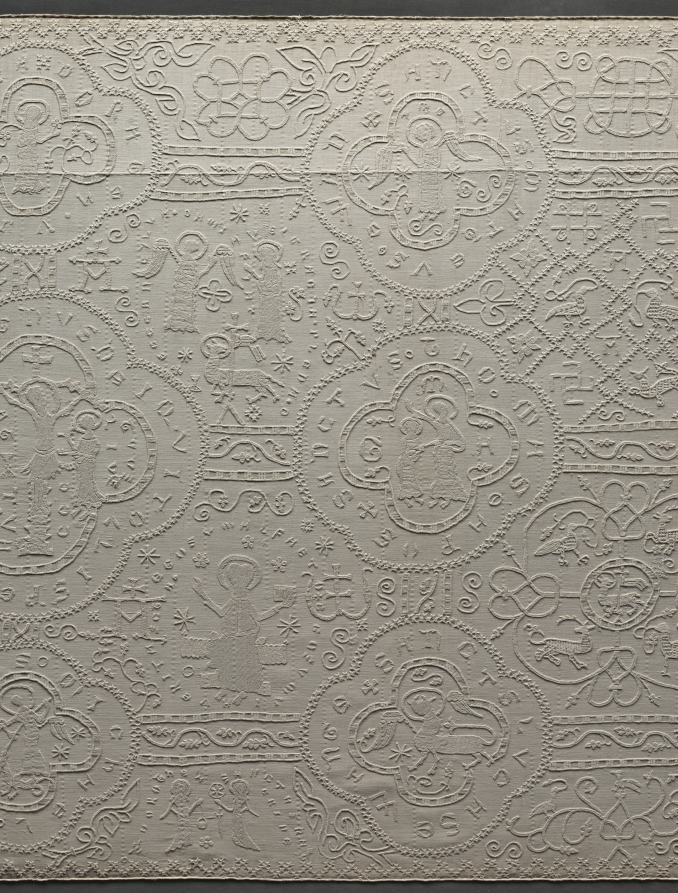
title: Altar Cloth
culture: Germany, Altenberg on the Lahn, Premonstratensian Convent, 14th century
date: c. 1350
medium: embroidery: linen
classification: Embroidery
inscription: various motifs enclosed in quatrefoils with identifying inscriptions in Gothic letters.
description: This large, embroidered altar cloth is one of the rarest, most important medieval church furnishings in existence. It was stitched by nuns in the Premonstratensian Convent in Altenberg on the Lahn River, north of Frankfurt, Germany, and was used to cover the church’s high altar in the weeks leading up to Easter. The cloth is an example of linen embroidery, a specialty of German nuns in the later Middle Ages. The Altenberg monastery church once had valuable furnishings; the high altar retable (a decorated frame with sculptures and paintings on the top of an altar) has survived, the main parts of which are now in the Städel Museum in Frankfurt, Germany.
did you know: When lit from behind, the previously hidden details emerge and the complex design becomes evident.